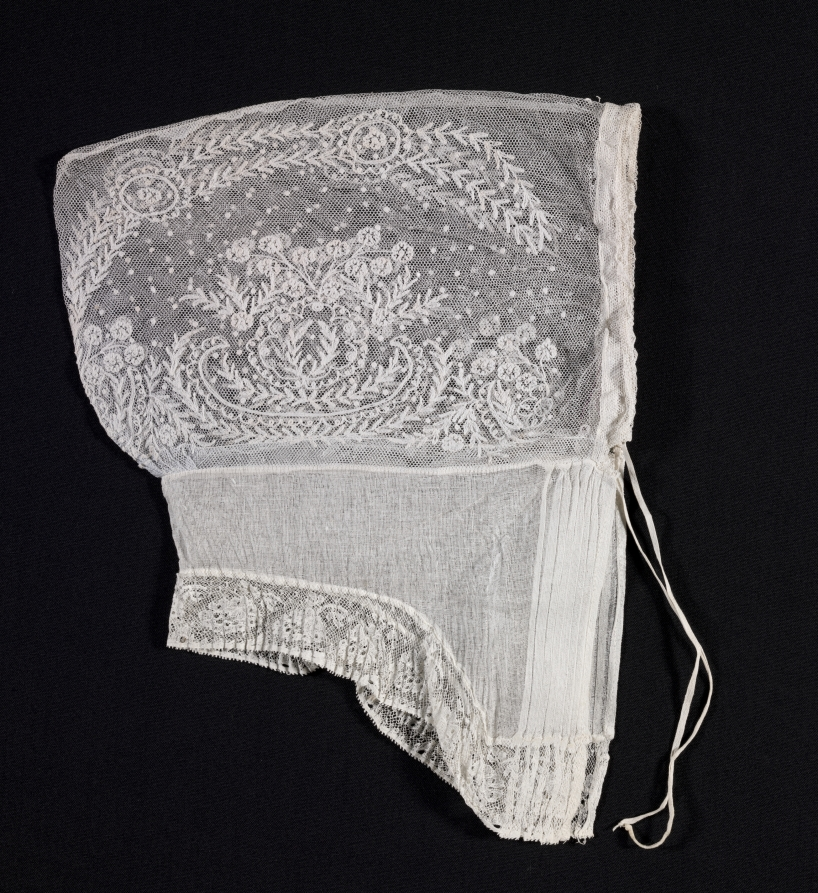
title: Cap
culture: Netherlands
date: 1900s-1940s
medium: Plain weave cotton, machine-made net lace, bobbin lace edging, and embroidery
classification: Garment